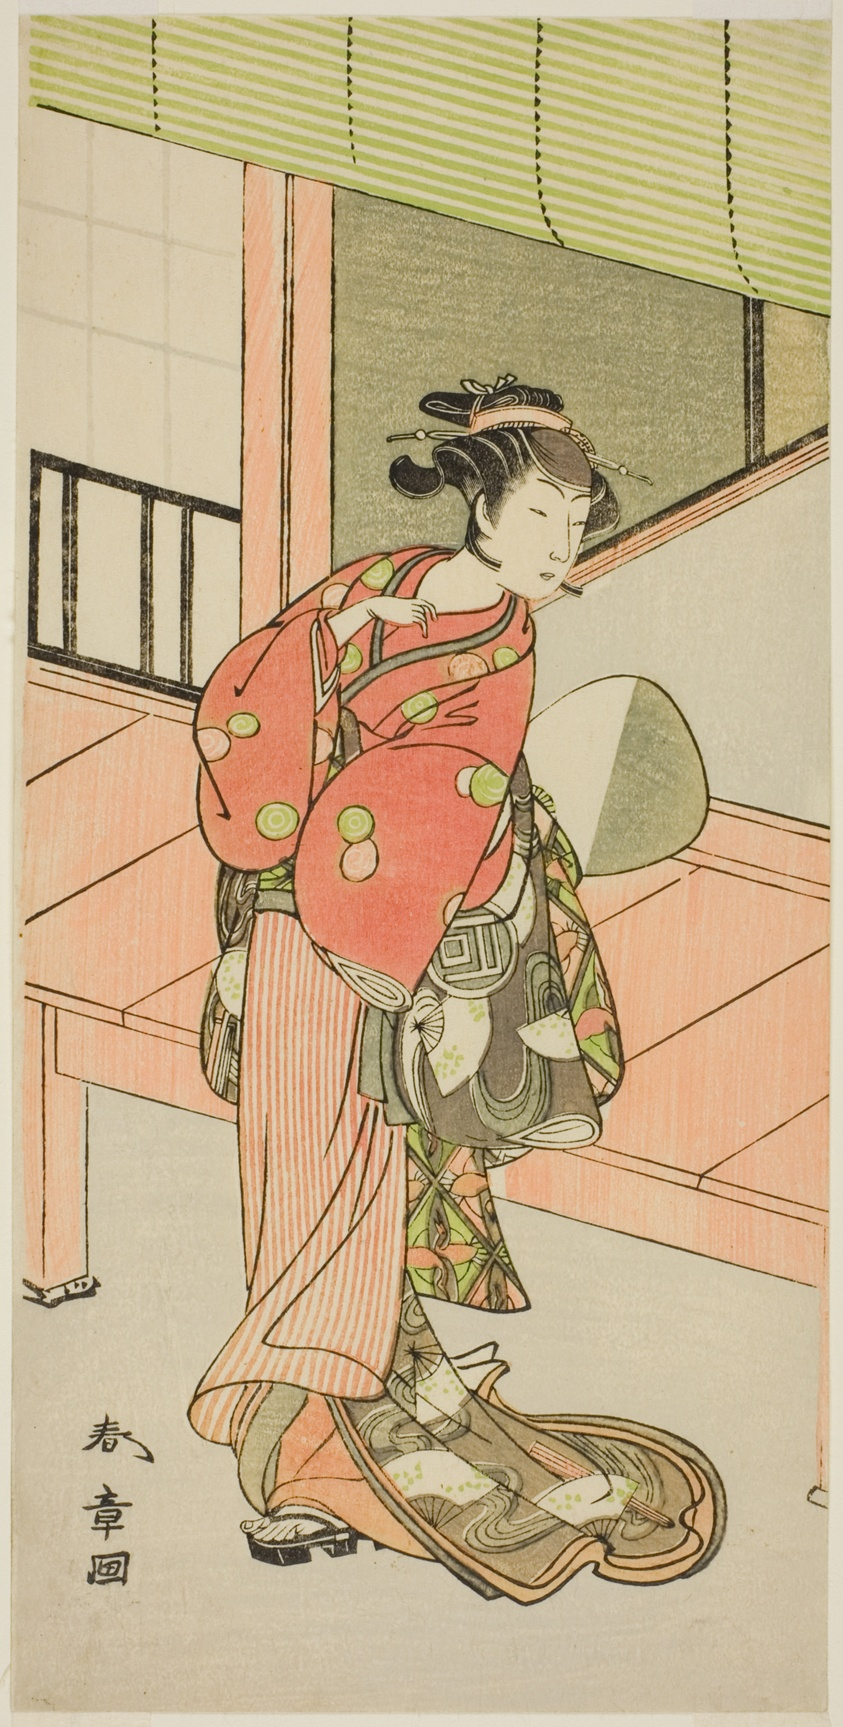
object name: Print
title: The Actor Sanogawa Ichimatsu II in an Unidentified Role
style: Japanese (culture or style)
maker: Katsukawa Shunsho 勝川 春章; Japanese, 1726-1792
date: c. 1773/74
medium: Color woodblock print; hosoban; possibly left sheet of diptych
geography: Japan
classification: woodblock print; print; asian art